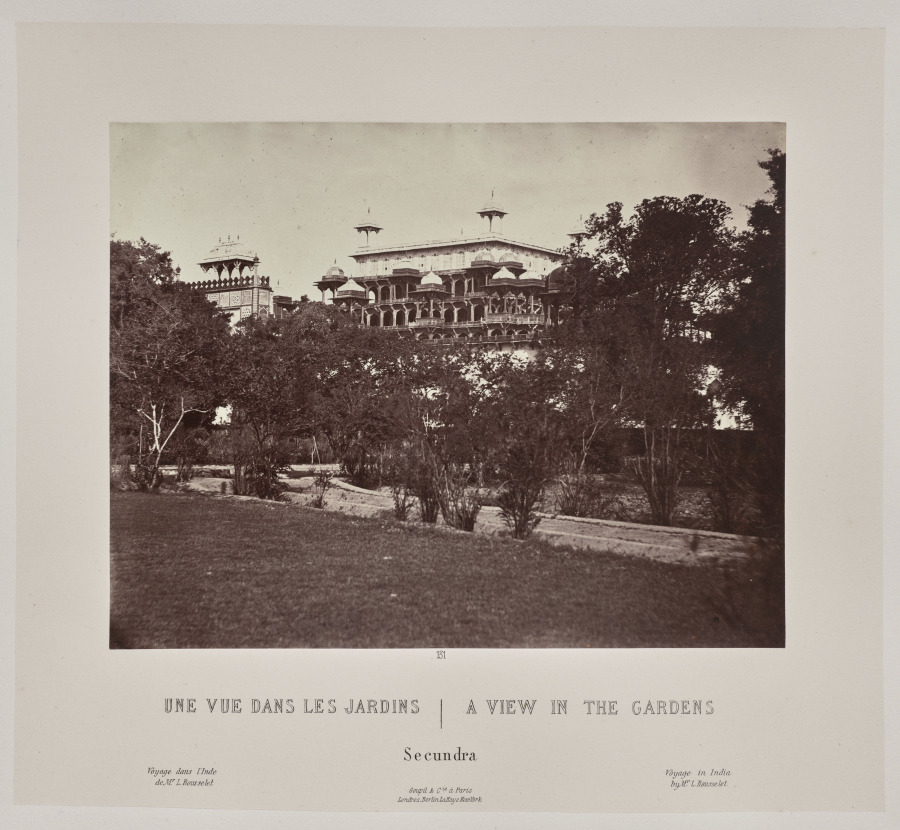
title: A View in the Gardens, Secundra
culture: France, 19th century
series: India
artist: Louis-Théophile Marie Rousselet (French, 1845–1929)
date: 1865–68, published 1869–70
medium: Albumen print from glass plate negative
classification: Photograph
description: Concerned that his drawings did not do justice to the splendor of India’s monuments, Rousselet learned photography in India that year, a remarkable accomplishment. He proved to be a talented photographer with a sophisticated sense of composition. The scenes in this volume sweep across sites of Sultanate, Rajput, and Mughal power in northern India, from the sacred Hindu city of Varanasi on the Ganges River to Alwar in Rajasthan. Also included are several scenes of industry and portraits of Indian rulers.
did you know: Louis Rousselet described himself as a “scientific traveler” when he went to India alone at age 18 in 1863 and stayed into 1868.